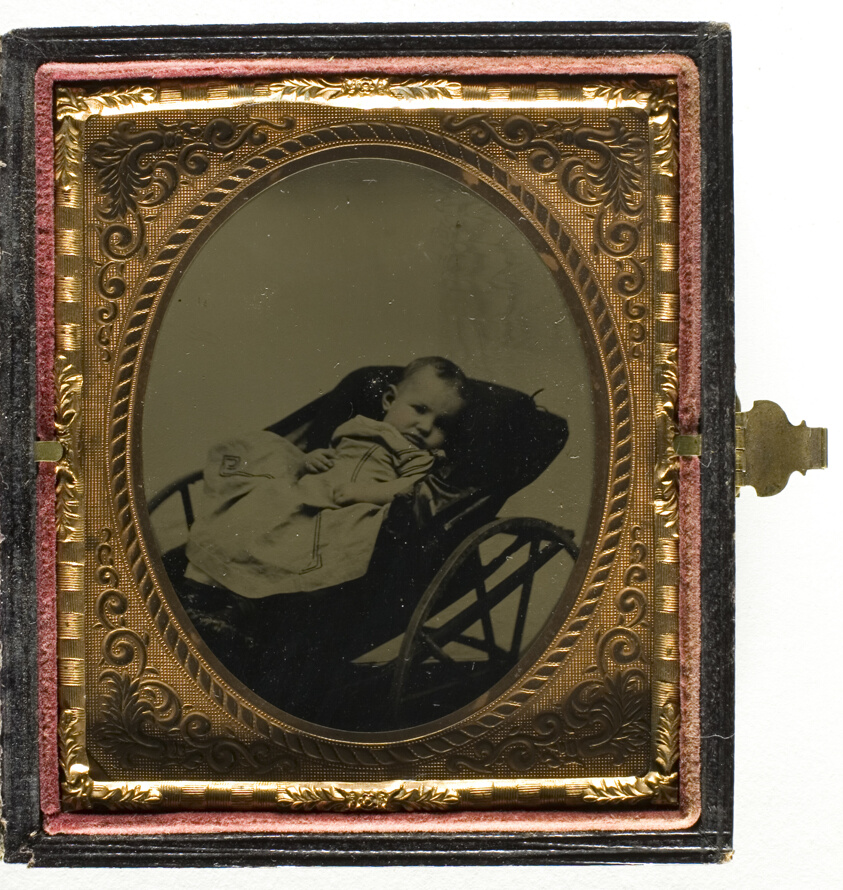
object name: Photograph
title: Untitled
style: 19th century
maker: Artist unknown; 19th century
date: 1839/99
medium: Tintypes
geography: Unknown Place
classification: daguerreotype; photographic process; photography; photograph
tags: portraits, portraits: male subject, photography